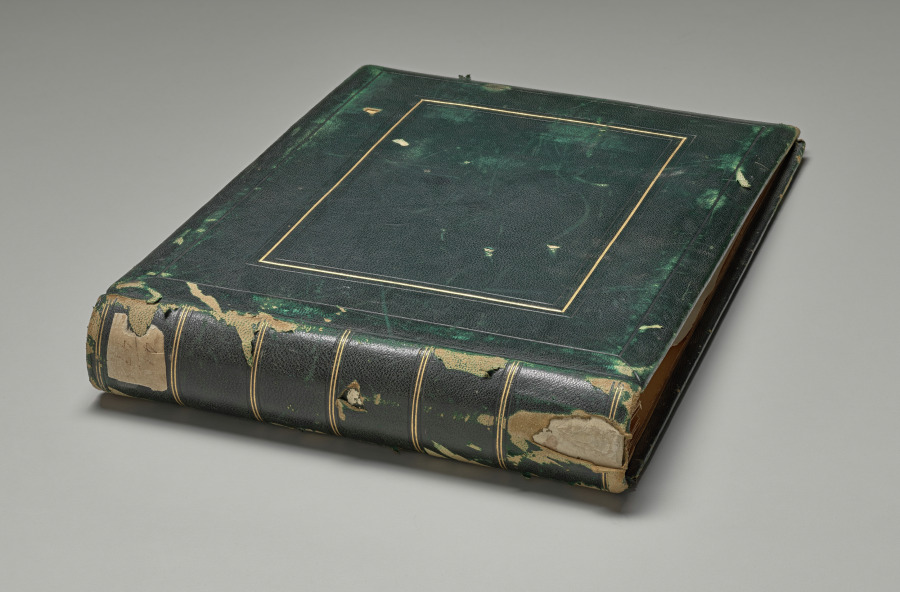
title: 46 Photographs from an Album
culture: India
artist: Raja Deen Dayal (Indian, 1844–1905)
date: c. 1882–87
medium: 46 albumen prints on 26 sheets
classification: Bound Volume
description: These photographs are part of an album, now disassembled, of around 105 photographs taken in India between 1885 and summer 1887 that provide glimpses into the lives of the British colonial elite and royal and upper-class Indians. The museum holds another group of 37 pictures from this album (2016.266), which was probably commissioned by a British civil servant visiting or working in India around 1888 as a personal souvenir of his experiences there.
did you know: Raja Deen Dayal is regarded now, and was considered during his lifetime, to be India’s most important 19th century photographer.